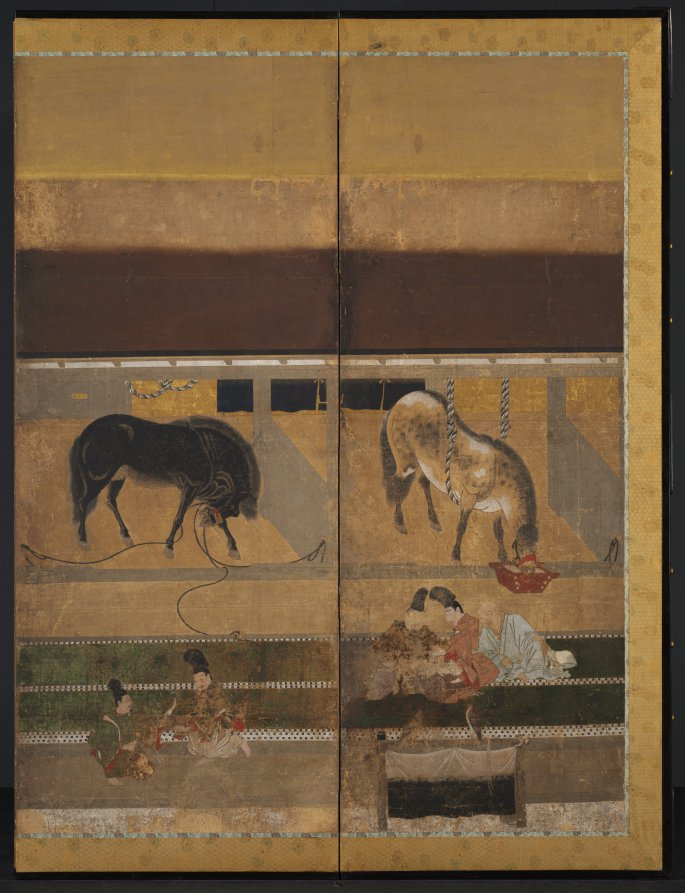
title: Horse Stable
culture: Japan, Muromachi period (1392–1573)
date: early 1500s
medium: One of a pair of six-panel folding screens; ink, color, and gold on paper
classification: Painting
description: Prized horses in stables may be the main theme of the pair of screens of which this screen is a part, but a lot of action is happening on the veranda. Falconry is the focus of this screen, and a lively atmosphere develops in the interplay of the dynamic horses and the birds of prey.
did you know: This is the earliest surviving example of the "horse stable" theme in Japanese screens.